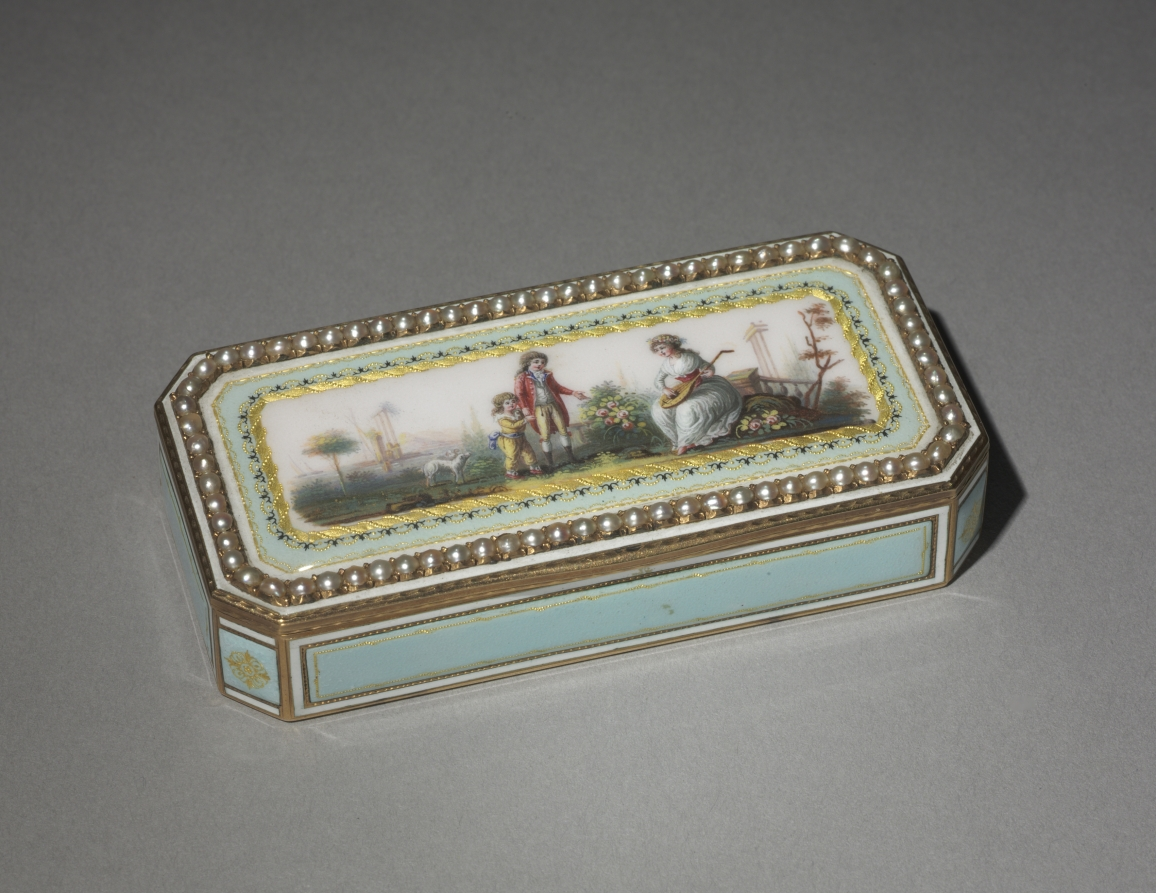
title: Snuff Box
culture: Switzerland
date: late 1700s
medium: gold and enamel with pearls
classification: Miscellaneous